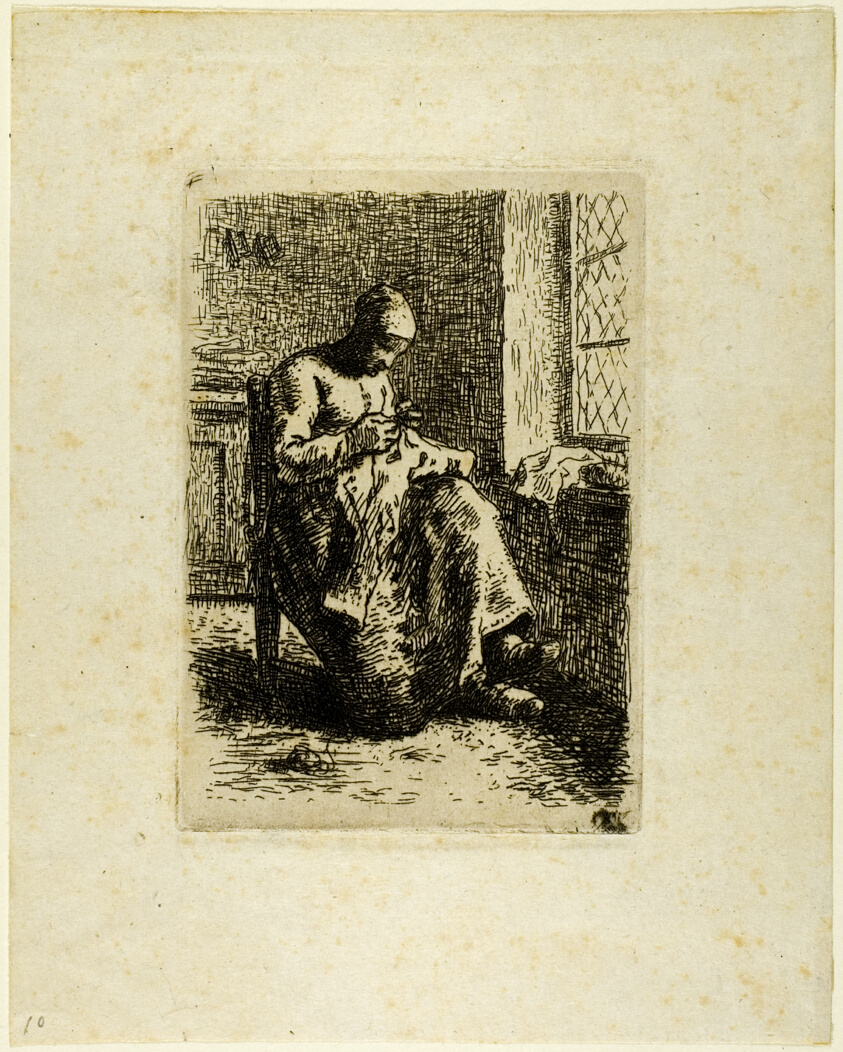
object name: Print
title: A Woman Sewing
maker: Jean François Millet (French, 1814-1875); printed by Auguste Delâtre (French, 1822-1907)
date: 1855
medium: Etching on ivory laid paper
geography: France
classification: etching; print; prints and drawing